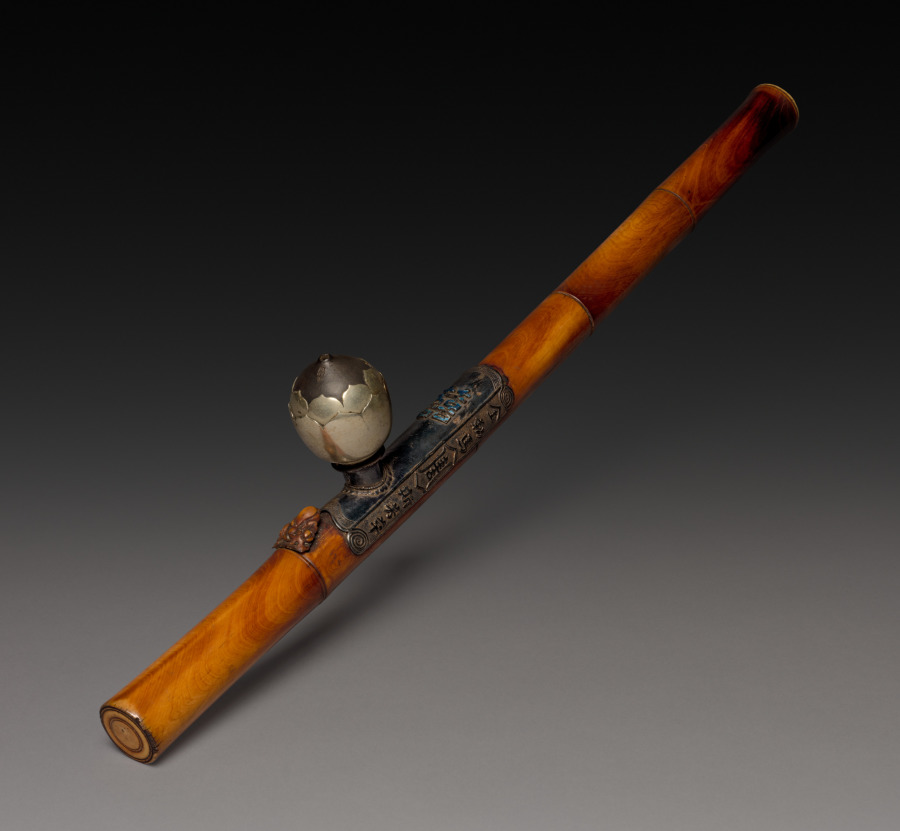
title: Opium Pipe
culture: China, Qing dynasty (1644-1911)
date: 1800s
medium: ivory stem decorated with silver and enamel work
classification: Miscellaneous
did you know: The ivory stem has five sections.